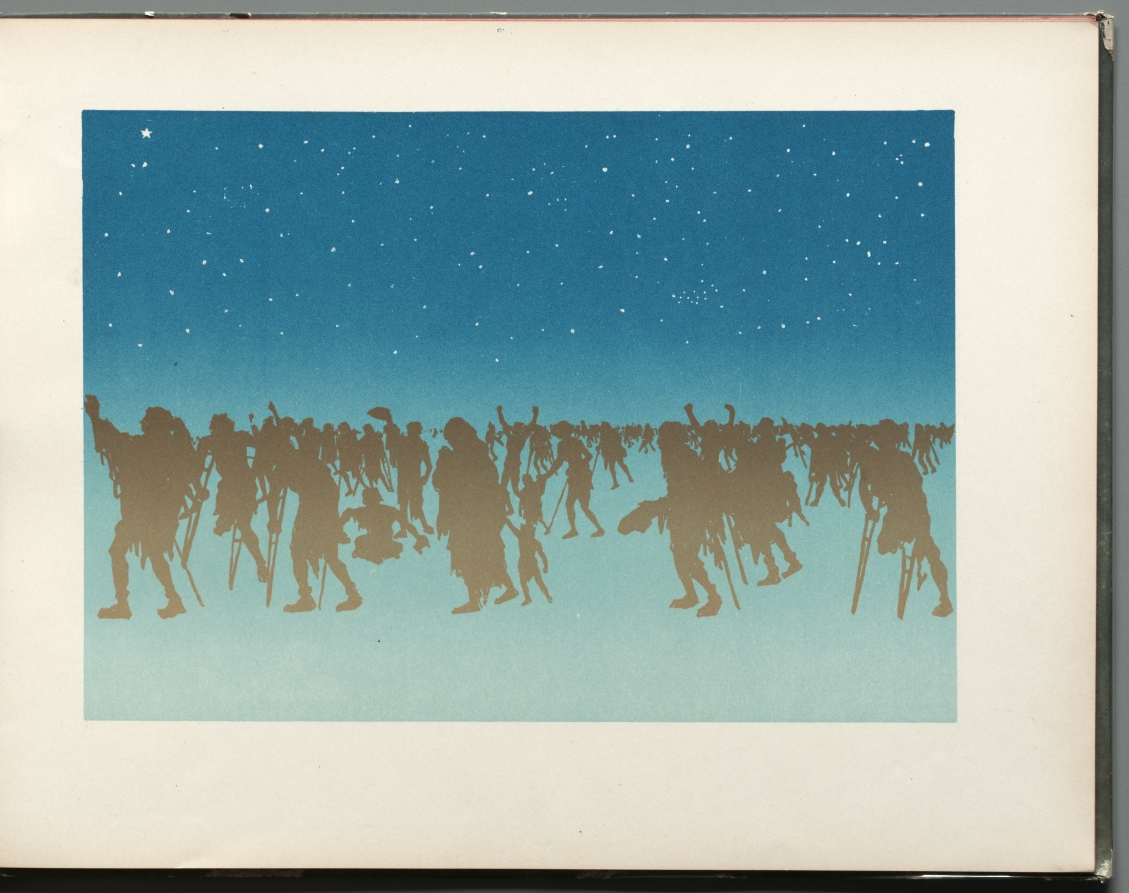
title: The Progress of the Stars: Les Lépreux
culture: France, 19th century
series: Bound Volume illustrating the poetry and music of Georges Fragerolle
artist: Henri Rivière (French, 1864–1951)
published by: C. Marpon & Flammarion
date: 1890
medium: 18 color lithographs in a Bound Volume illustrating the poetry and music of Georges Fragerolle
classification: Bound Volume